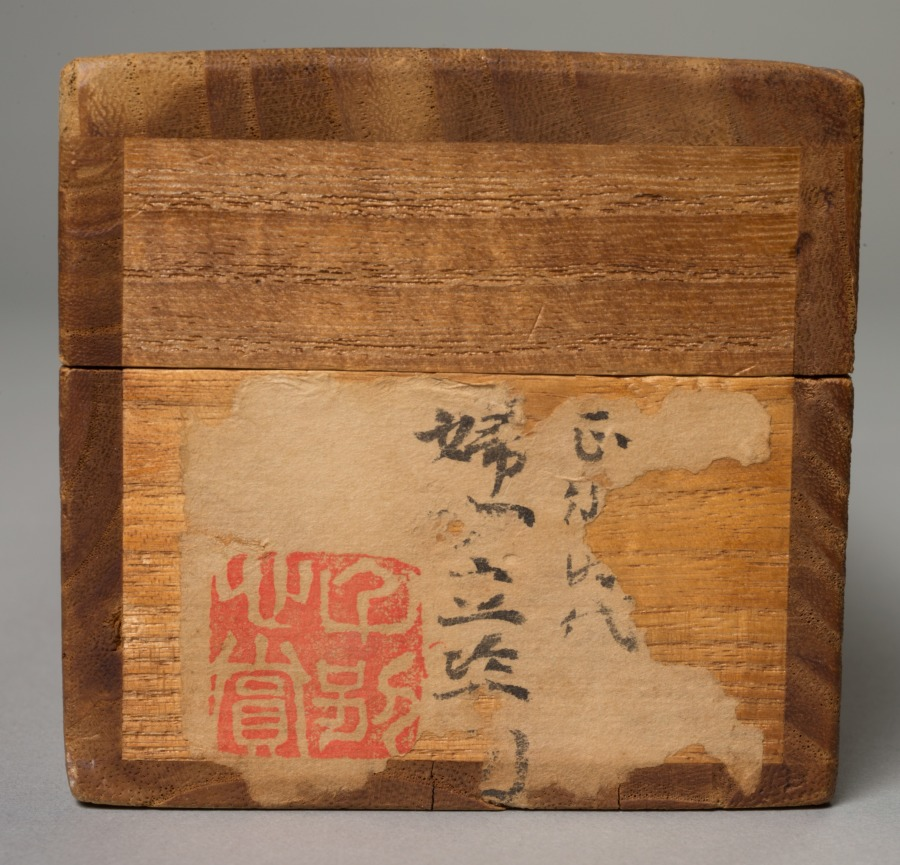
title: Courtesan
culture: Japan, Edo period (1615–1868)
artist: studio of Kaigetsudō Ando (Japanese, c. 1671–1743)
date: 1700s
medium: hanging scroll; ink and color paper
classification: Painting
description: Paintings of the courtesans who provided men with a sophisticated menu of appealing fashions, flattery, witty banter, music, dancing, and sexual services in the Yoshiwara district of the city of Edo (Tokyo) were the bread and butter of the Kaigetsudō studio, in whose style this work is painted. Their paintings emphasized bold, sweeping calligraphic ink lines in rendering the figures’ forms, along with high-contrast colors and patterns in their typically solitary subjects’ garments. Aside from the occasional prop or poem, the space around the dramatic figure was left entirely blank.